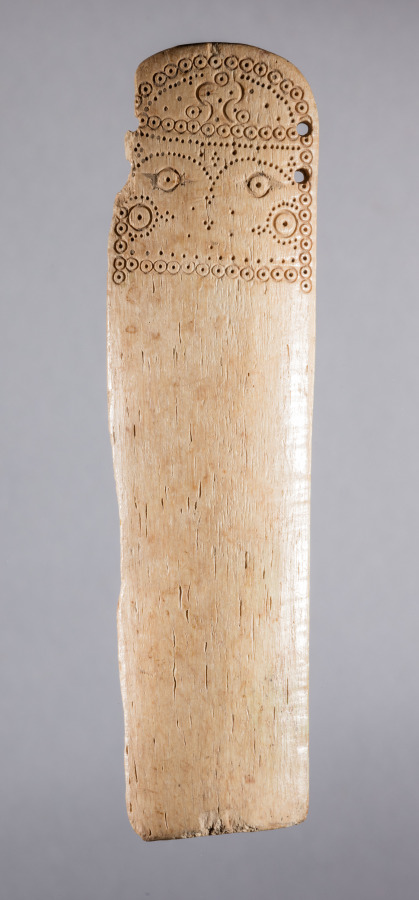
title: Figurine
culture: Iran, early Islamic period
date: 700s - 900s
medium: bone, incised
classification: Miscellaneous